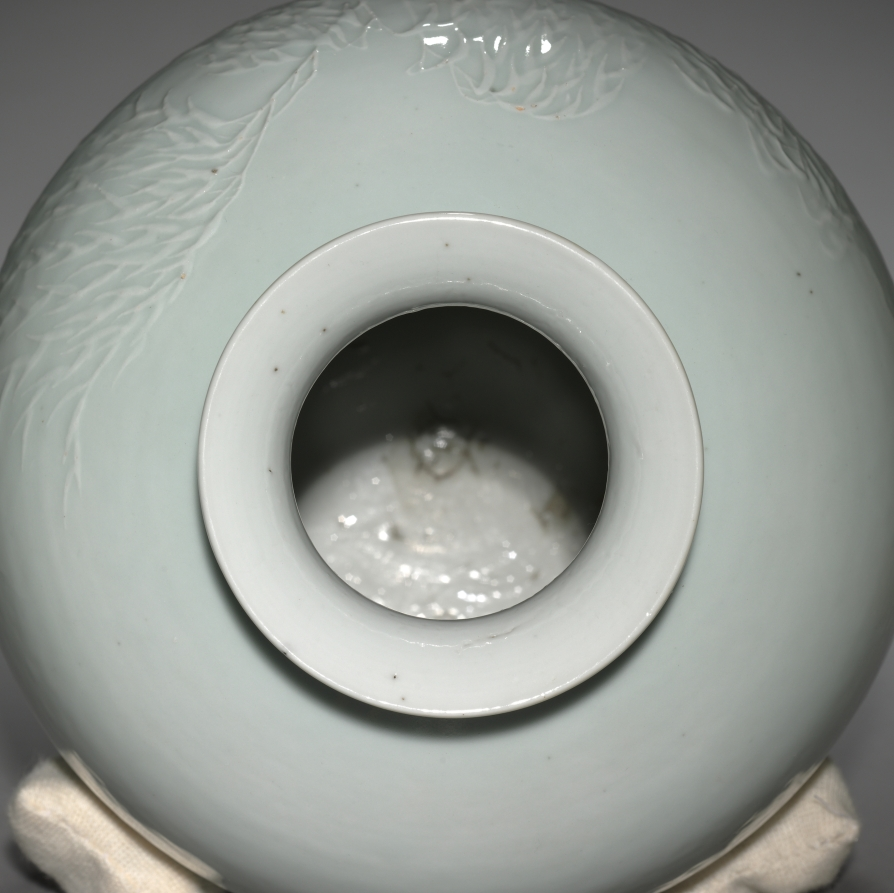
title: Jar with Crane and Willow in Relief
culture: China, Jiangxi Province, Jingdezhen kilns, Qing dynasty (1644–1911)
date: 1700s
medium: porcelain with raised and overglaze enamel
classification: Ceramic